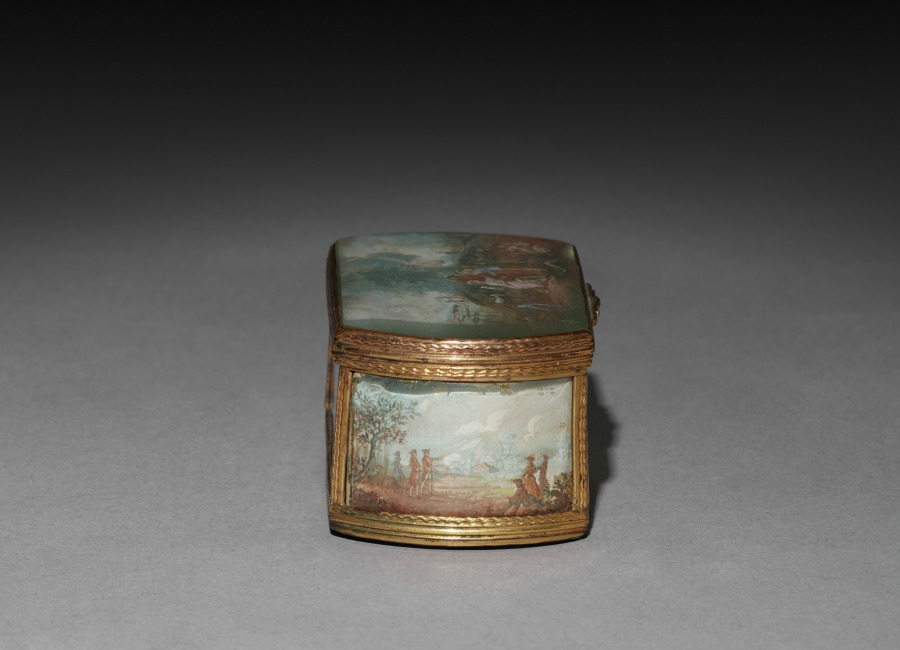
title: Snuff Box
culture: France, 19th century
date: 1800s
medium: gilt metal box with painted miniatures under glass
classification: Miscellaneous